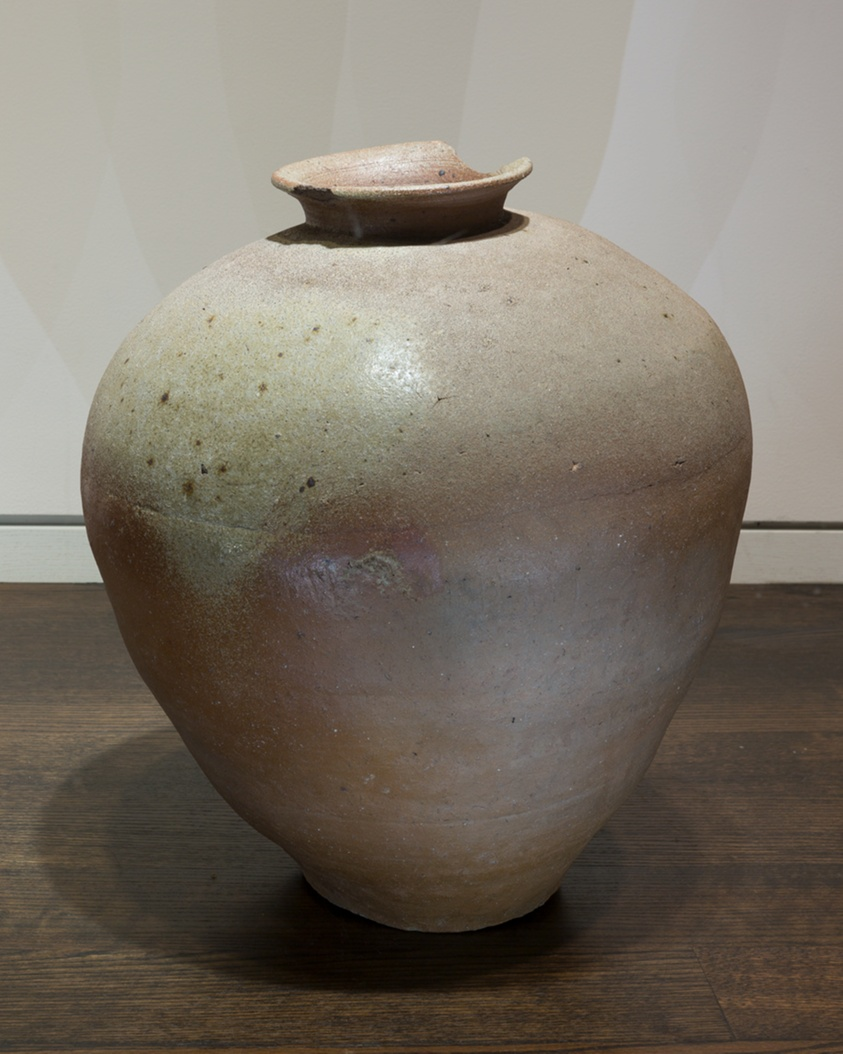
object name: Vessel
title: Tamba-Ware Jar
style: Japanese (culture or style)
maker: Japanese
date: 15th century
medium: Stoneware with ash glaze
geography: Japan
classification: stoneware; ceramics; asian art; vessel